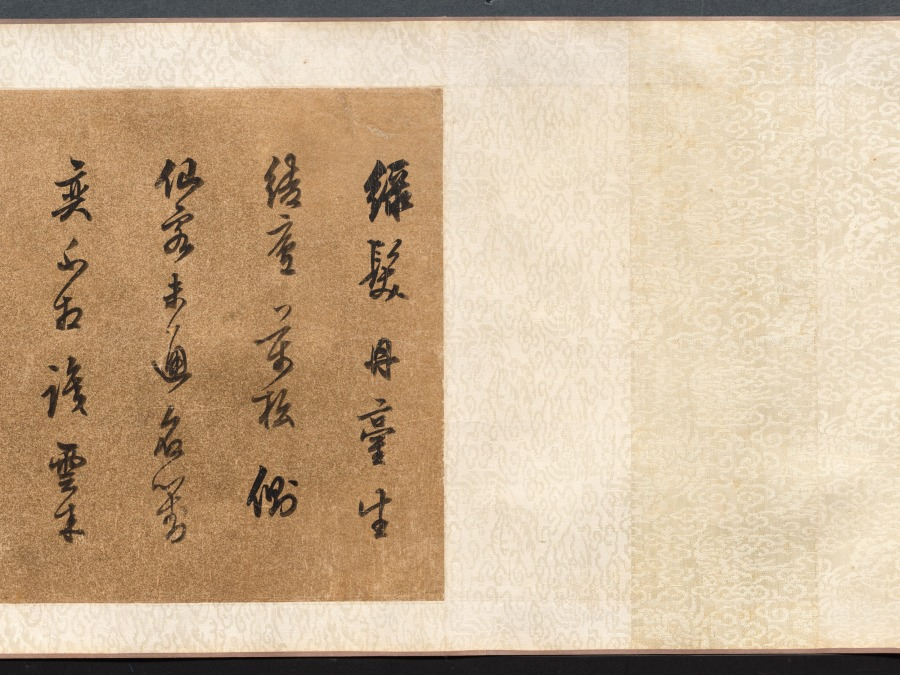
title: Four Poems: Calligraphy in Cursive Script (xingshu)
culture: China, Ming dynasty (1368–1644)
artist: Chen Jiru (Chinese, 1558–1639)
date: 1500s-1600s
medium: handscroll; ink on gold speckled paper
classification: Calligraphy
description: Written in graceful calligraphy with well-composed characters, the artist communicates his thoughts and state of mind in four poems. Characters written in dark, thick strokes convey rhythm, and indicate the moment after the writer had paused to recharge his brush with ink. Chen Jiru was a native of Huating (modern Shanghai). His calligraphy style resembles that of his friend, influential calligrapher Dong Qichang (1555–1636). Unlike Dong, Chen did not pursue government service: he burned his Confucian robes, declined a summons to serve at court, and immersed himself in literature, calligraphy, and painting.